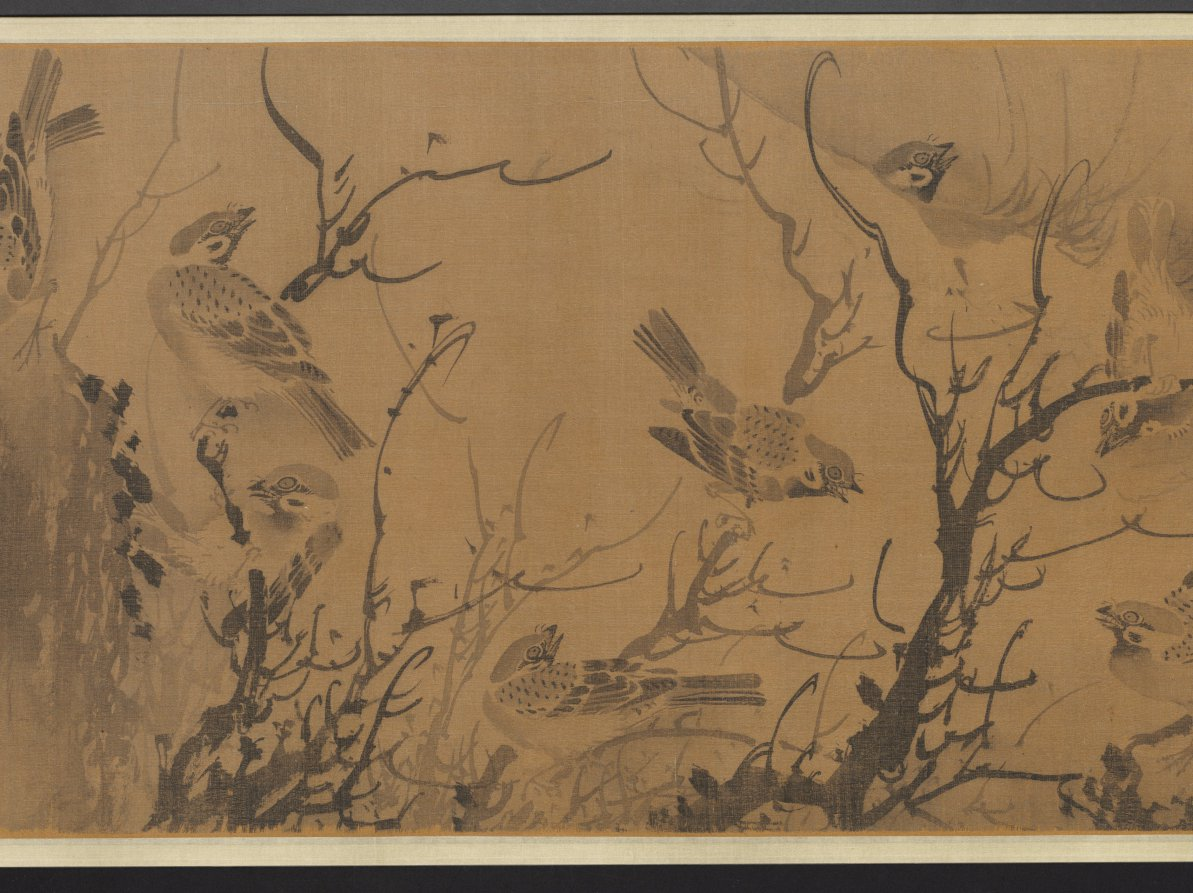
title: A Hundred Sparrows in a Lofty Grove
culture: China, Ming dynasty (1368–1644)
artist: attributed to Lin Liang (Chinese, 1416–1480)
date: 1368–1644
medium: handscroll; ink on silk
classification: Painting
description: Sparrows engaged in all kinds of activities frolic amid leafy branches, blades of grass, rocks, and a waterfall. As our eyes move over the scroll, the artist engages us in enjoying the sparrows’ carefree movements in a natural setting. The charming birds were painted from close observation in swift and fluent brushstrokes. Sparrows are a common bird and in Chinese painting they often represent the commoner in human society as opposed to the noble pheasant or peacock representative of the ruling class.